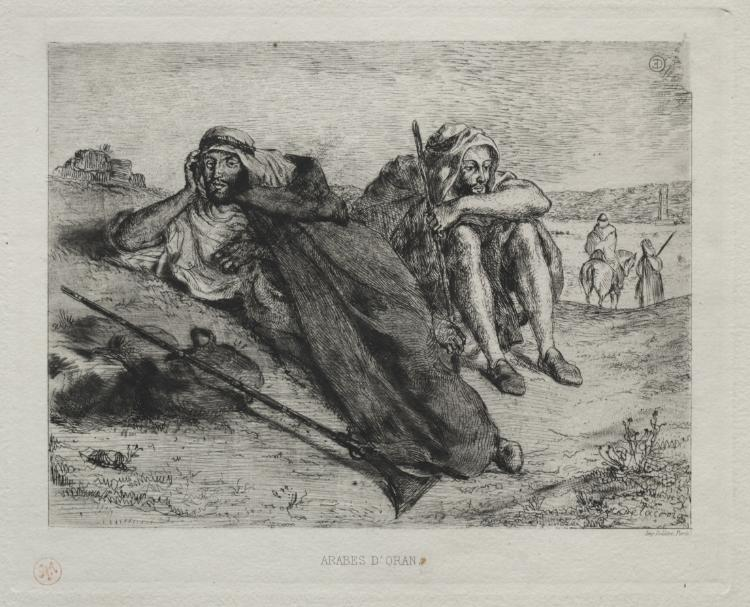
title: Arabes d'Oran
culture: France, 19th century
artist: Eugène Delacroix (French, 1798–1863)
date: 1833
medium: etching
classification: Print